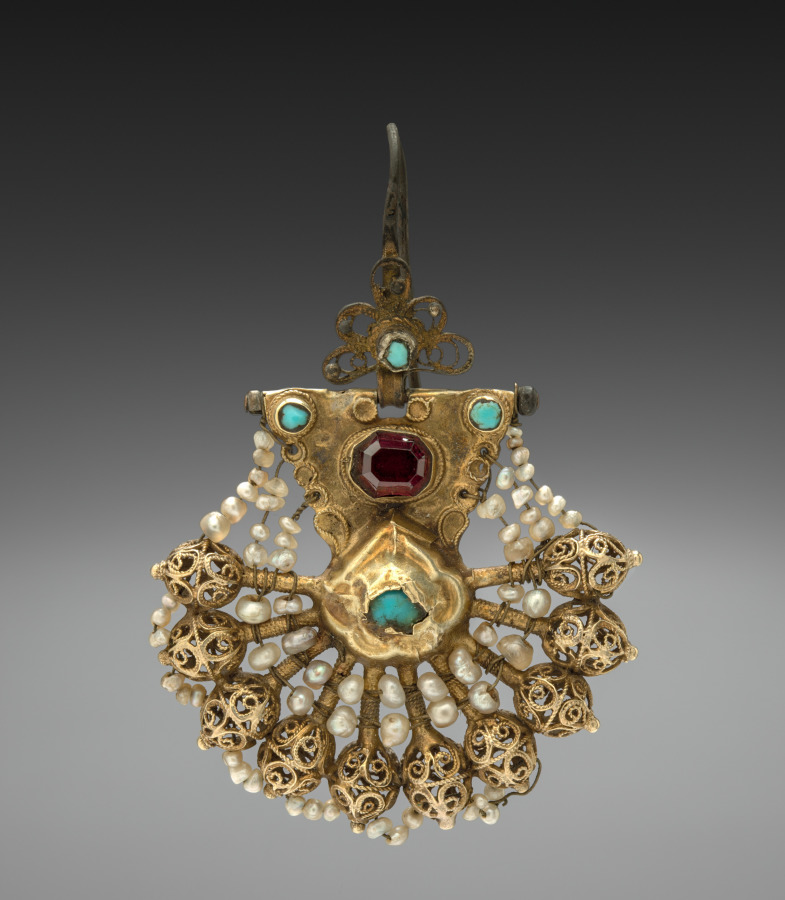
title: Earring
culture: Hungary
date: 1700s - 1800s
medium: silver gilt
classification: Jewelry